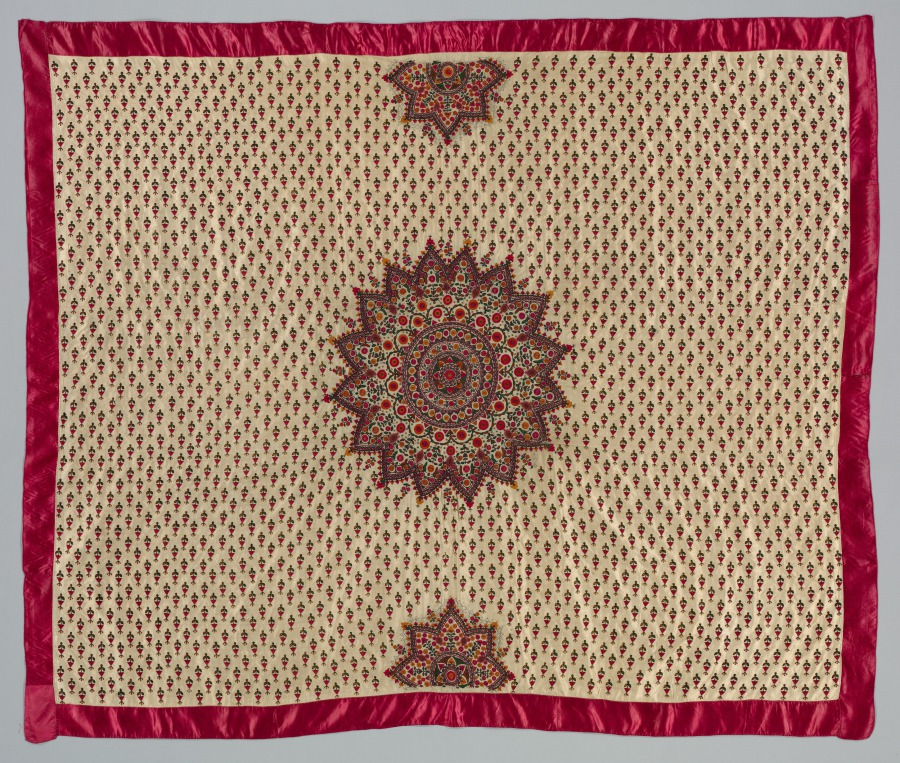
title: Shawl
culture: Western India, Gujarat, Kachchh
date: 1800s–early 1900s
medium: silk thread on silk ground, embroidery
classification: Embroidery